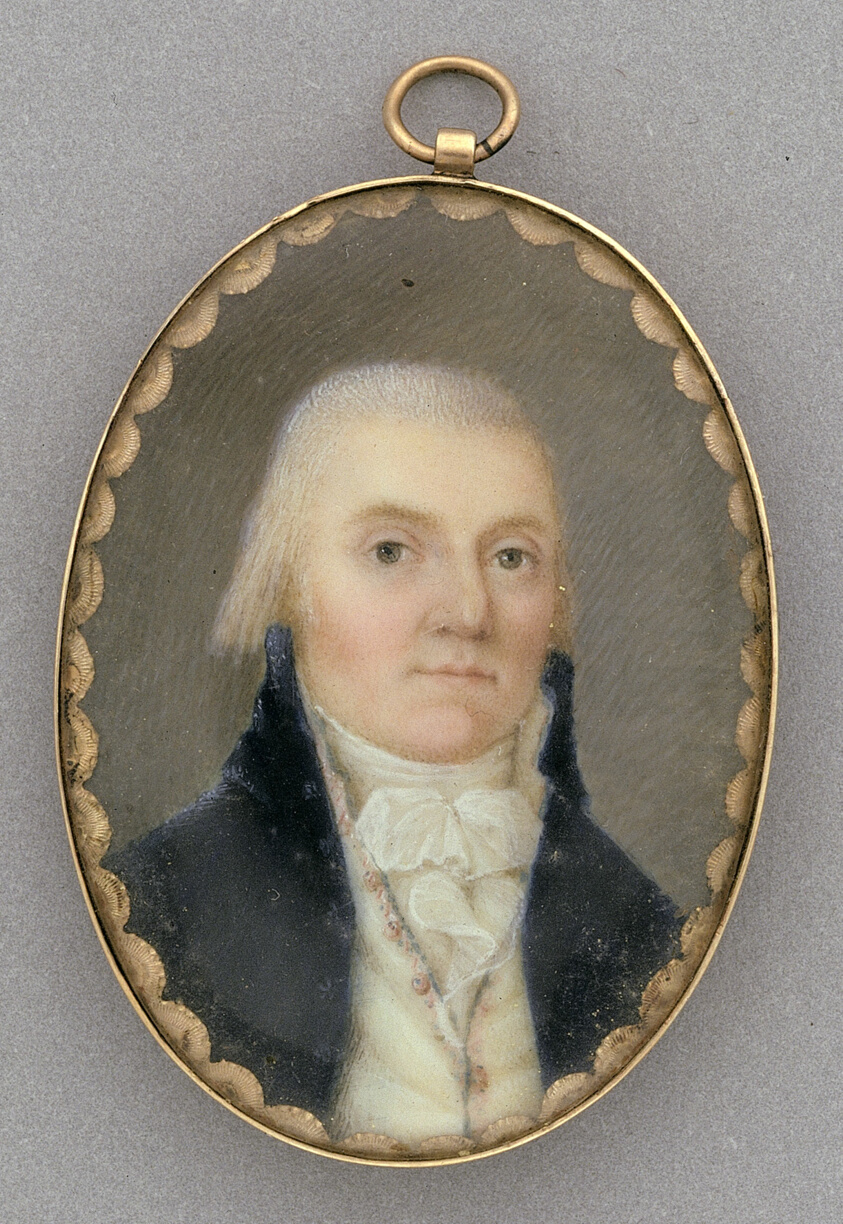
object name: Miniature Painting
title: Portrait of Augustine Taylor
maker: John Ramage (American, born Ireland, 1748–1842)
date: 1777–94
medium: Watercolor on ivory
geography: United States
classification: miniature painting; american arts; miniature; painting